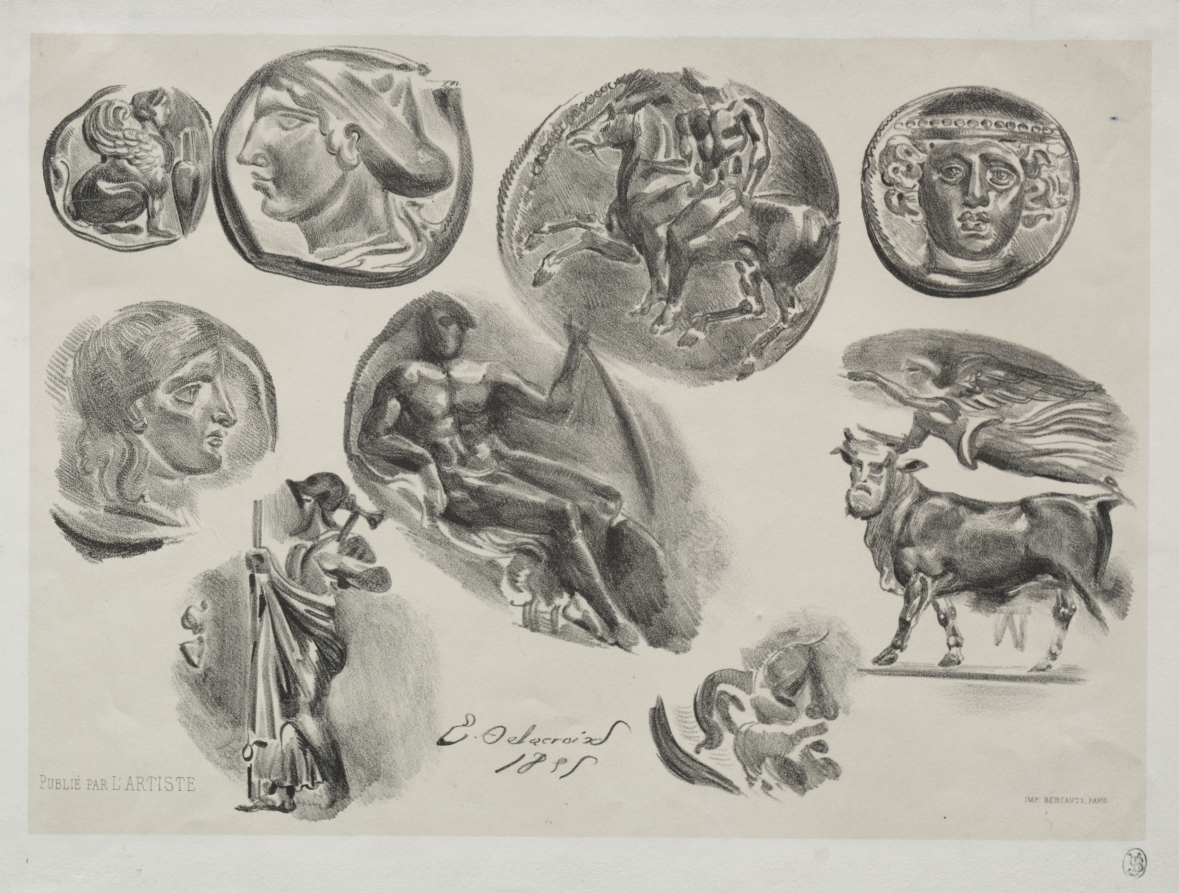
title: Sheet with Nine Antique Medals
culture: France, 19th century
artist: Eugène Delacroix (French, 1798–1863)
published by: L'Artiste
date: 1825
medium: lithograph with beige tint stone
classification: Print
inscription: signed and dated, lower center, in stone: E. Delacroix 1825; lower left, printed: Publié par L'Artiste; lower right, printed: Imp. Bertauts, Paris